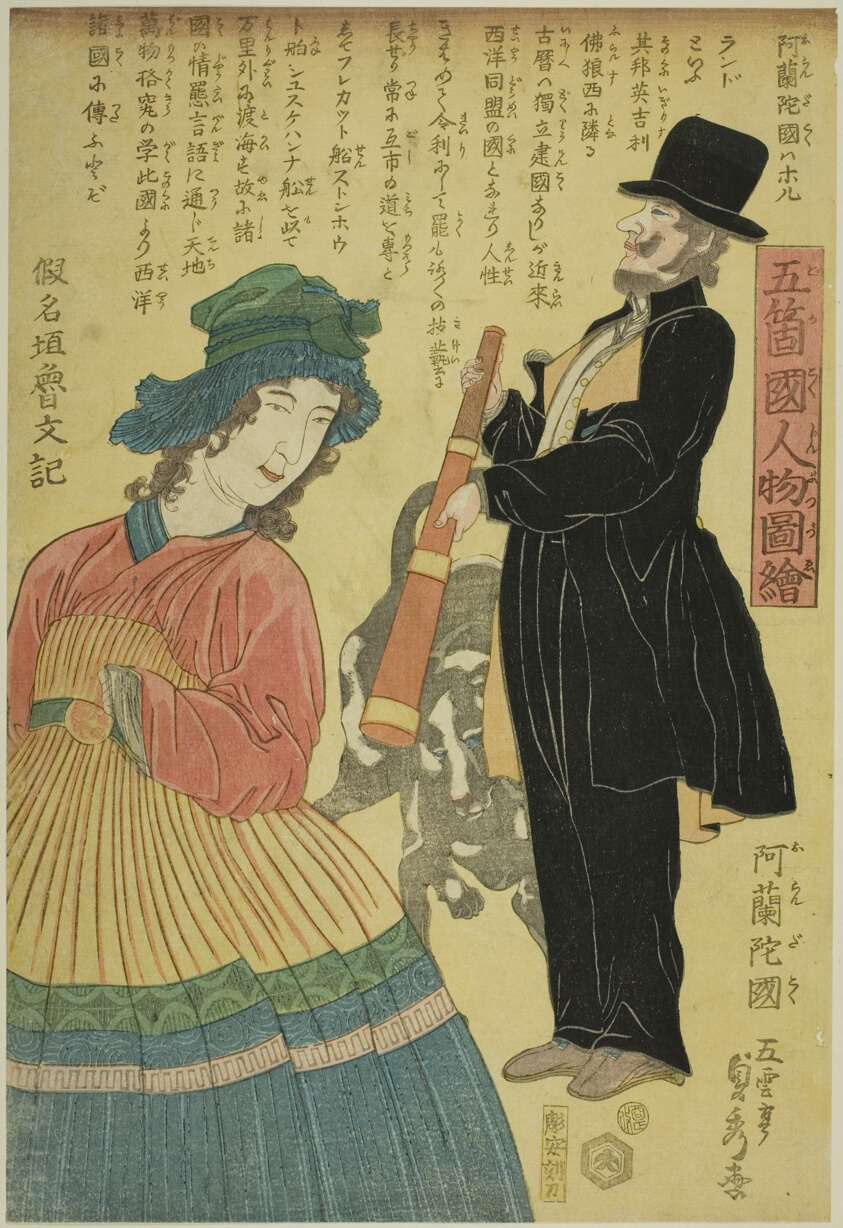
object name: Print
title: Holland (Oranda koku), from the series "People of the Five Nations (Gokakoku jinbutsu zue)"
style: Japanese (culture or style)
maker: Utagawa Sadahide (Japanese, 1807-1873)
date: 1861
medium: Color woodblock print; oban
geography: Japan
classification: woodblock print; print; asian art